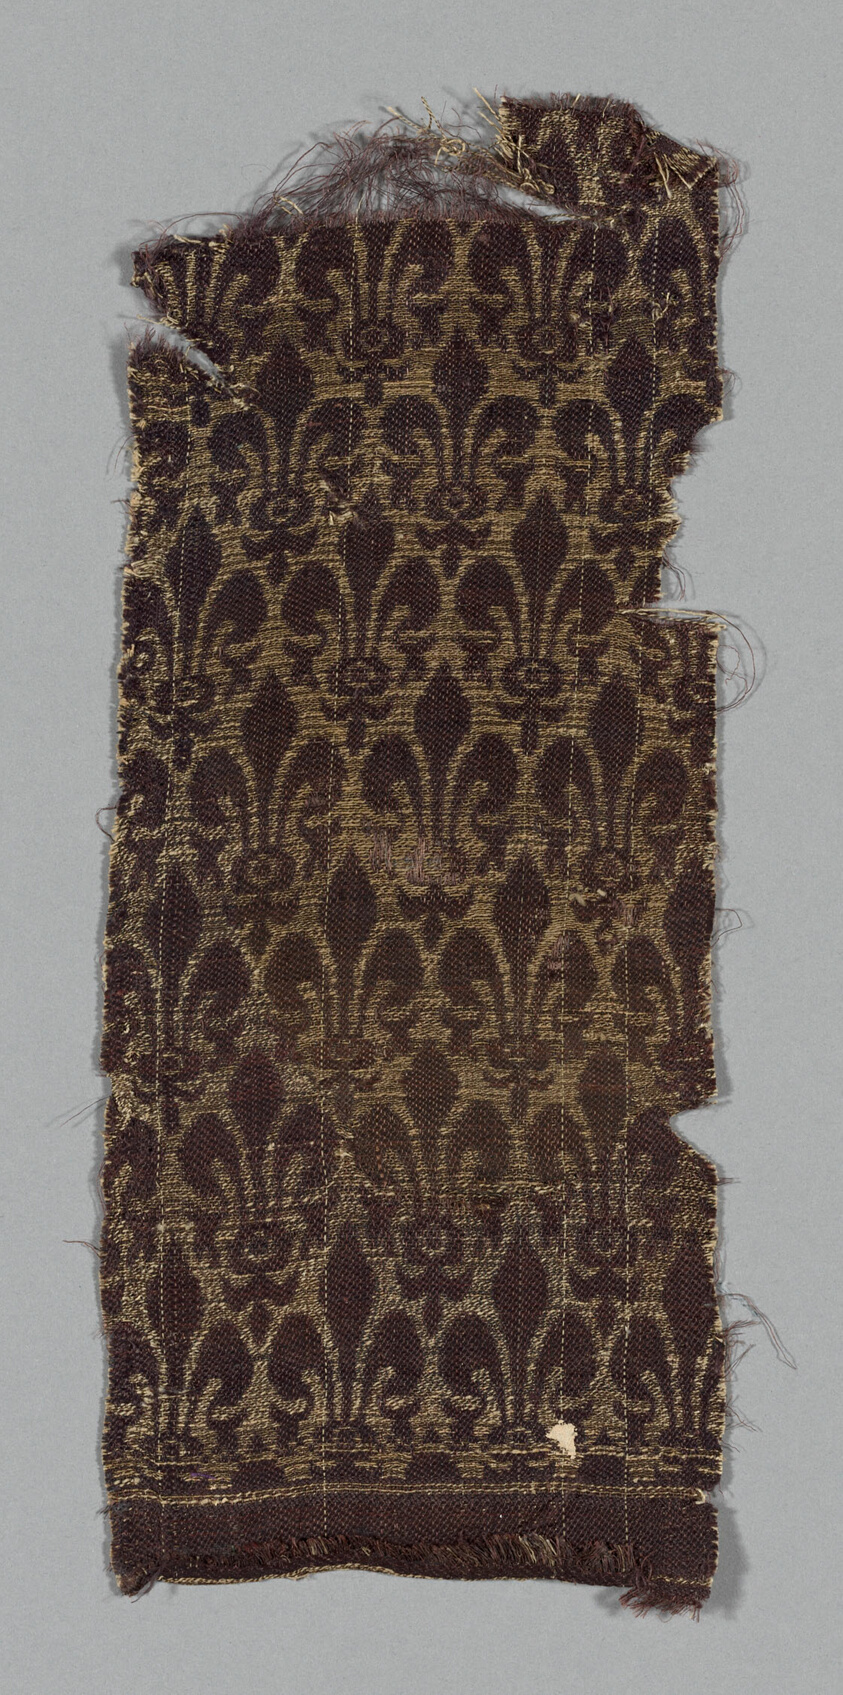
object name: Textile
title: Fragment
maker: Italy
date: 13th century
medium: Silk, twill weave, brocaded with metal thread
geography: Italy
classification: textile; weaving